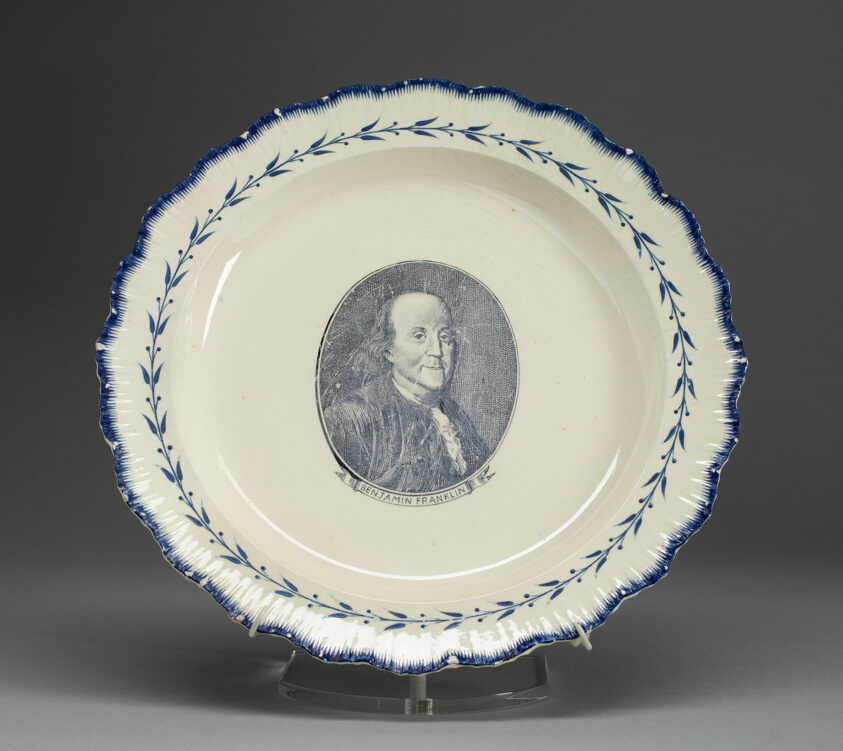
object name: Decorative Arts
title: Plate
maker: English for the American market; Leeds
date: c. 1790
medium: Creamware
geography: England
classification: plate (general, dish); tableware; american decorative arts; porcelain; european decorative arts; ceramics; decorative arts